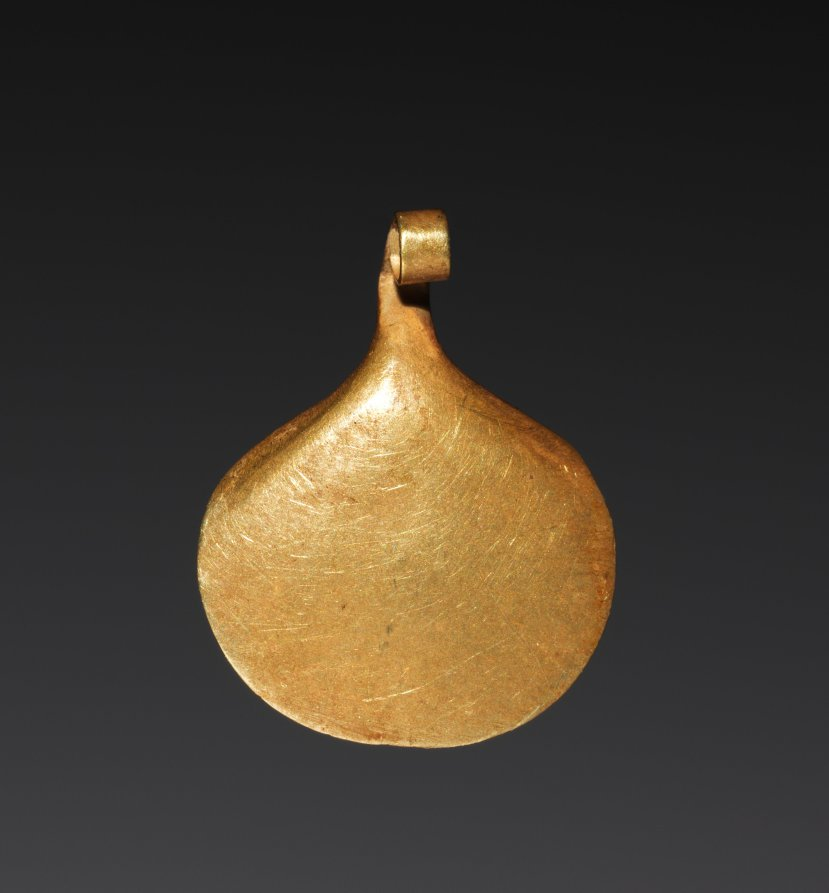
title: Bead in the Form of a Shell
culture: Egypt, Middle Kingdom (2040–1648 BCE)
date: 2040–1648 BCE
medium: gold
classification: Jewelry